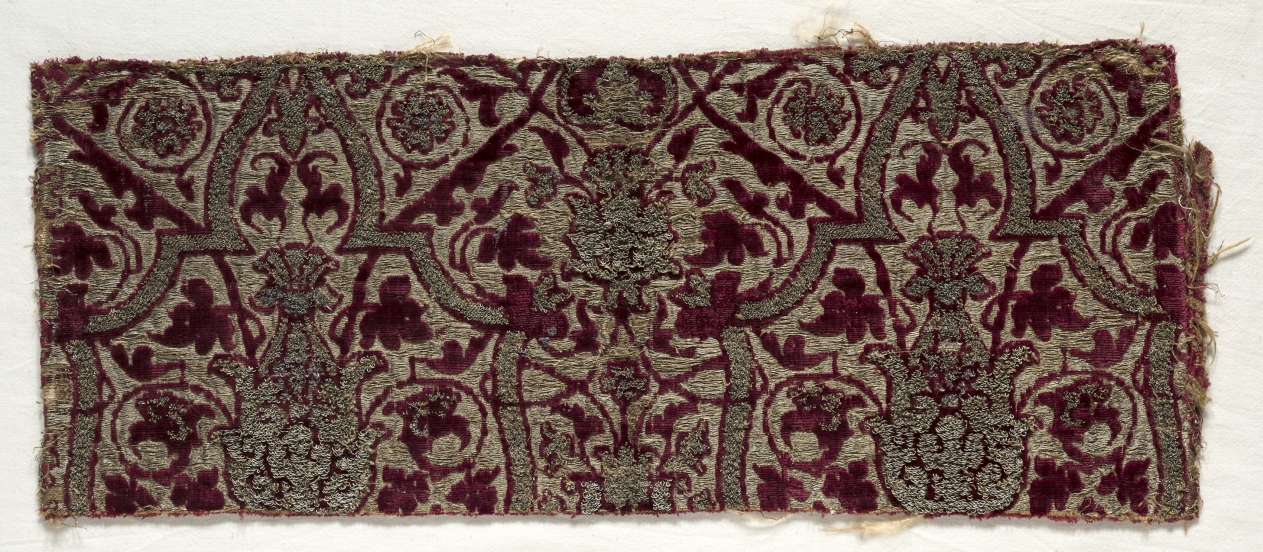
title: Velvet Textile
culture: Spain, late 15th century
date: late 15th century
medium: velvet; silk and metallic thread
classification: Velvet